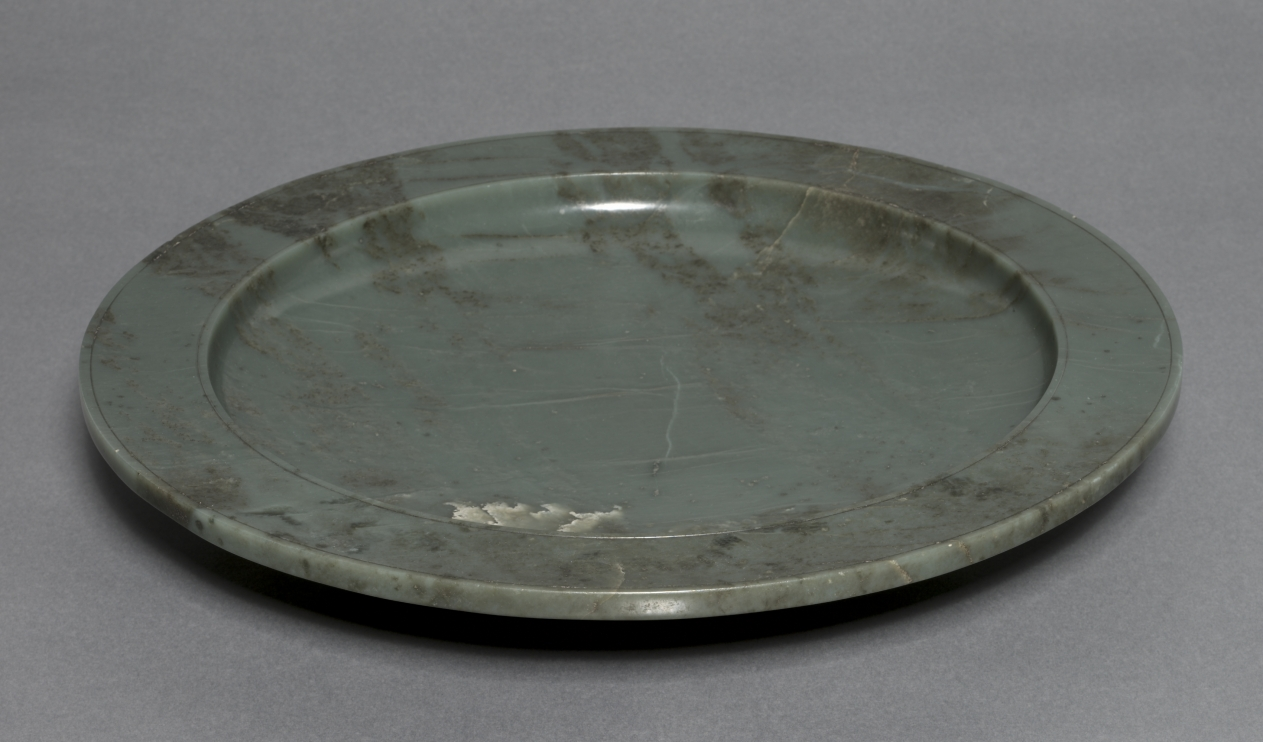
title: Footed Platter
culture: India, Mughal Dynasty (1526-1756)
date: 1600s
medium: nephrite (jade)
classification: Jade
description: Emperors Jahangir and Shah Jahan both admired jade. The material linked them to their ancestor Timur, whose tombstone in Samarkand was carved from a large piece of jade. This platter probably would have been used for serving fruit at courtly gatherings.